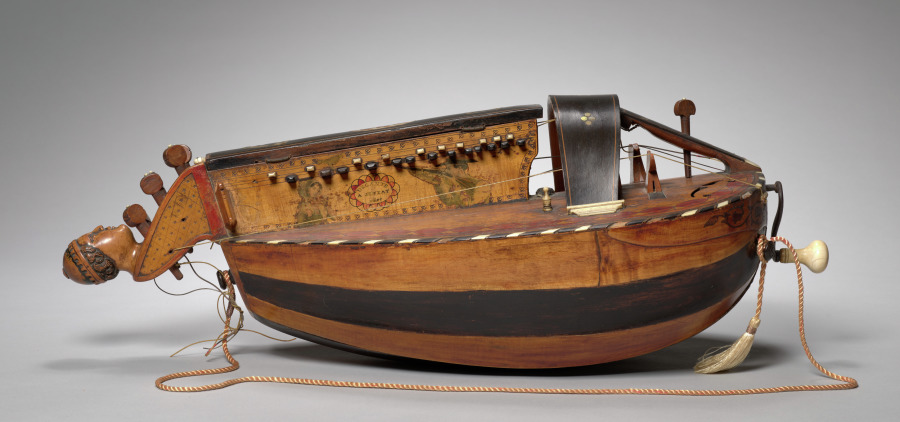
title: Vielle à Roue (Hurdy-Gurdy)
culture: France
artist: Jacques Decante (French, 1808–1884)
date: 1865–70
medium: Wood; mother-of-pearl inlay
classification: Musical Instrument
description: In France, the hurdy-gurdy is known as the vielle à roue (wheel fiddle). This six-stringed musical instrument produces sound by a hand crank-turned wheel that rubs against the strings. The wheel functions much like a violin bow, and single notes sound similar to those of a violin. Melodies are played on a keyboard that presses small wedges against the strings to change their pitch.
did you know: This vielle à roue was made in the French village of Jenzat, which was the manufacturing center for hurdy-gurdies during the 19th century.